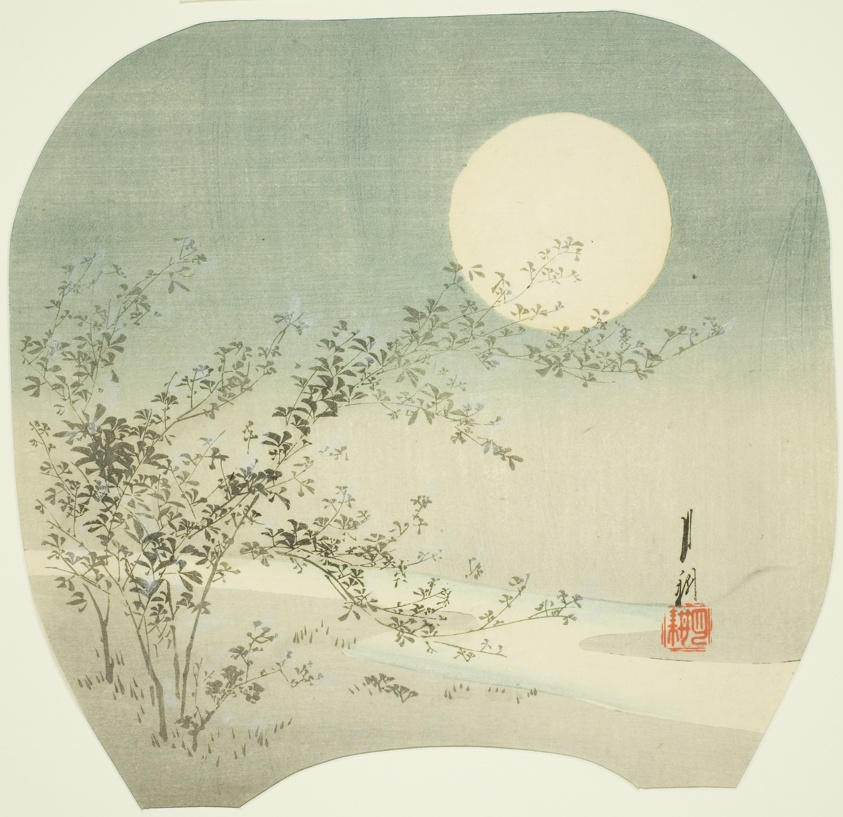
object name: Print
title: Full Moon and Autumn Flowers by the Stream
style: Japanese (culture or style)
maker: Ogata Gekko (Japanese, 1859-1920)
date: c. 1895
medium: Color woodblock print, uchiwa-e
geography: Japan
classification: woodblock print; print; asian art